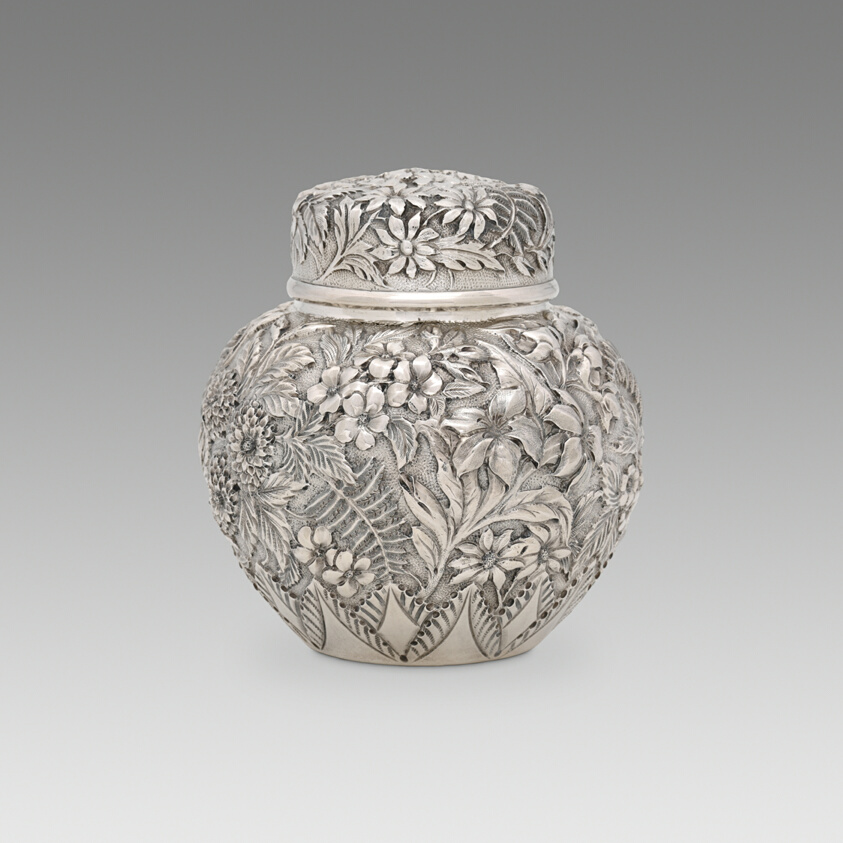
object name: Metalwork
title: Tea Caddy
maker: Jacobi and Jenkins; American, 1894–1908; Baltimore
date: 1896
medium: Silver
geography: Baltimore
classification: teaware; silver; container; american decorative arts; american arts; decorative arts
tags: dining, drinking